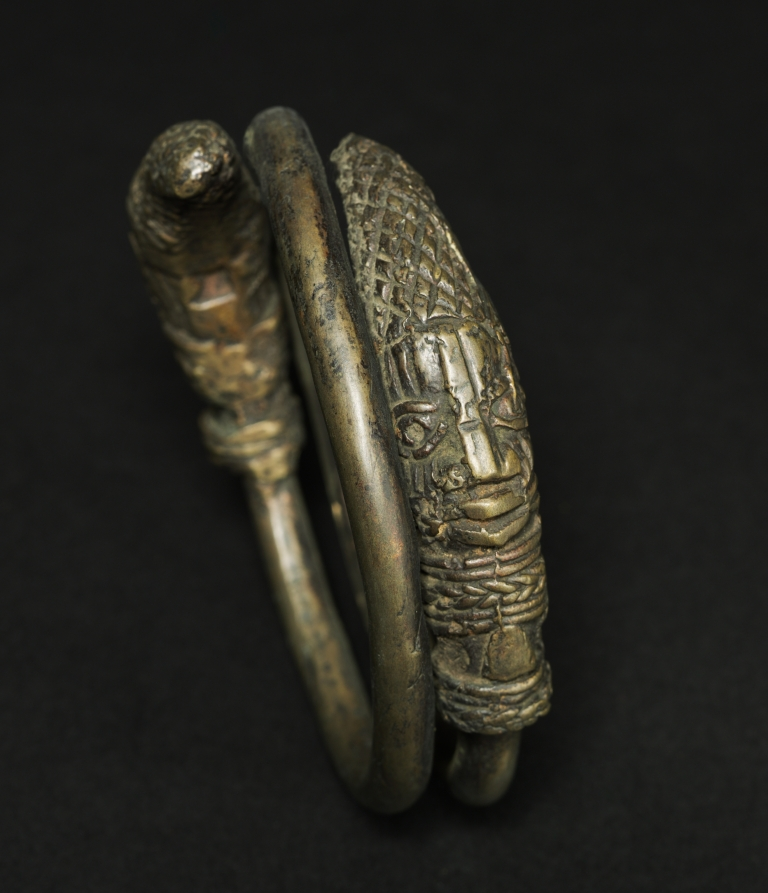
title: Hand Coil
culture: Nigeria, Benin Kingdom, Ẹdo peoples, members of the Igun Eronmwon (royal brasscasters) guild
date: 1800s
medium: Copper alloy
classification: Implements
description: While this looks like a bracelet, it wasn’t worn around a wrist. A chief or titleholder grasped this “hand coil” vertically during the annual Iguẹ festival, during which such men reaffirm their relationship to the Ọba, whose mystical powers are strengthened. An image of a man’s head caps each end of the thick, twisted metal. Repeated human touch rubbed the undecorated lengths bright and shiny. Though small, the coil’s detail is enormous: to capture it, the artist incised the designs in wax during the casting process. They show these men are elites, with necklaces, caps, and whisker-like facial markings.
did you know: This is a unique object; it was made using the lost-wax casting technique, which destroys the wax mold in the creation process.